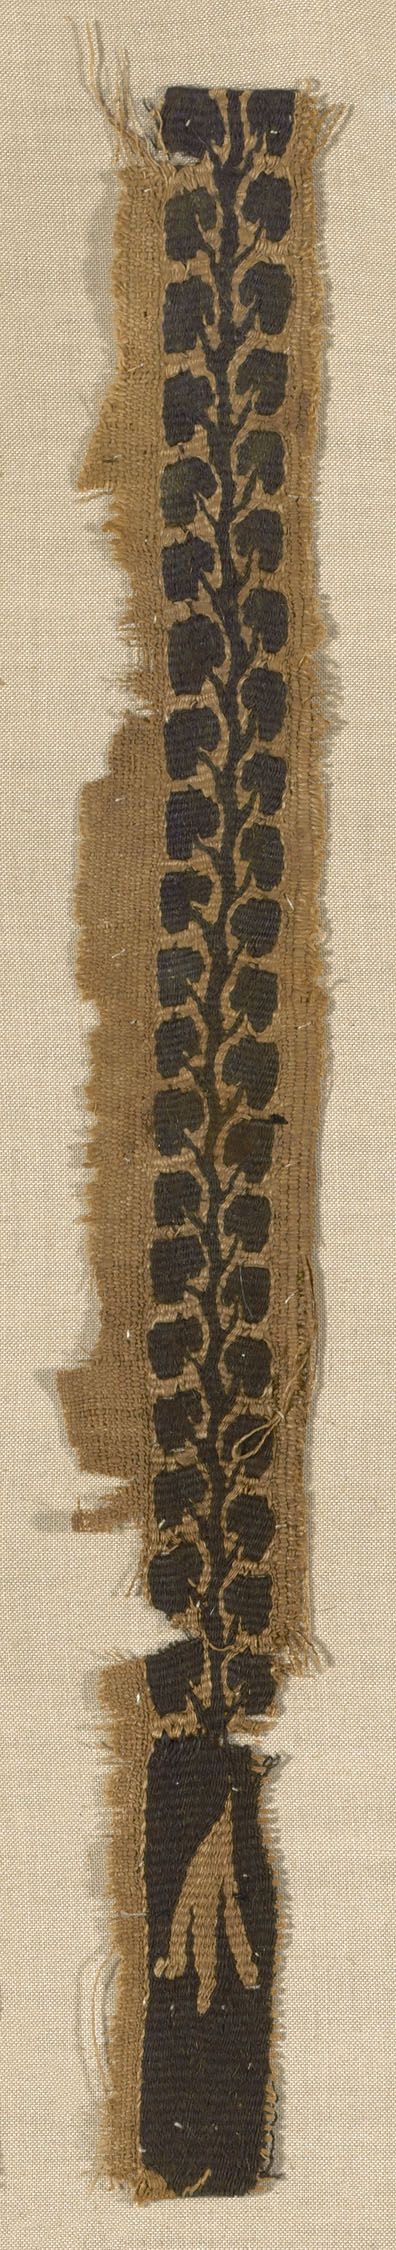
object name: Textile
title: Fragment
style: greco-roman (egyptian)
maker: Coptic (Egypt, Akhmin)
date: Greco–Roman period (30 B.C.– 641 A.D.), 4th/5th century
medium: Linen and wool, slit tapestry weave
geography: Egypt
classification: textile; weaving